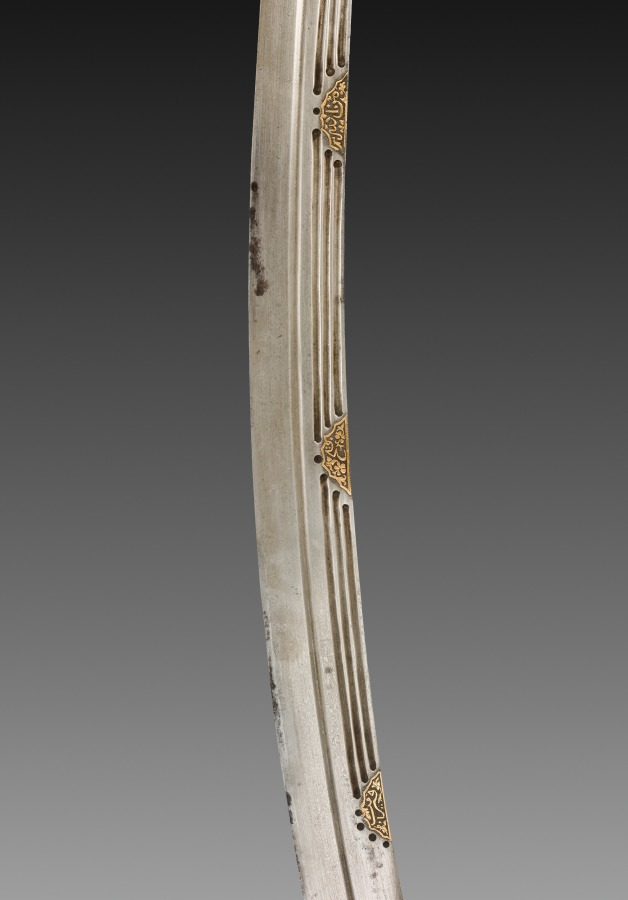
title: Silapa Sword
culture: India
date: 1700s–1800s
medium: gold with inlay and leather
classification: Arms and Armor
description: The exceptionally thin, curved blade is made of watered steel. The grooves, called fullers, allowed for weight reduction and prevented flexion. The costly hilt is fully overlaid with brass in steel, both inside and outside the knuckle.